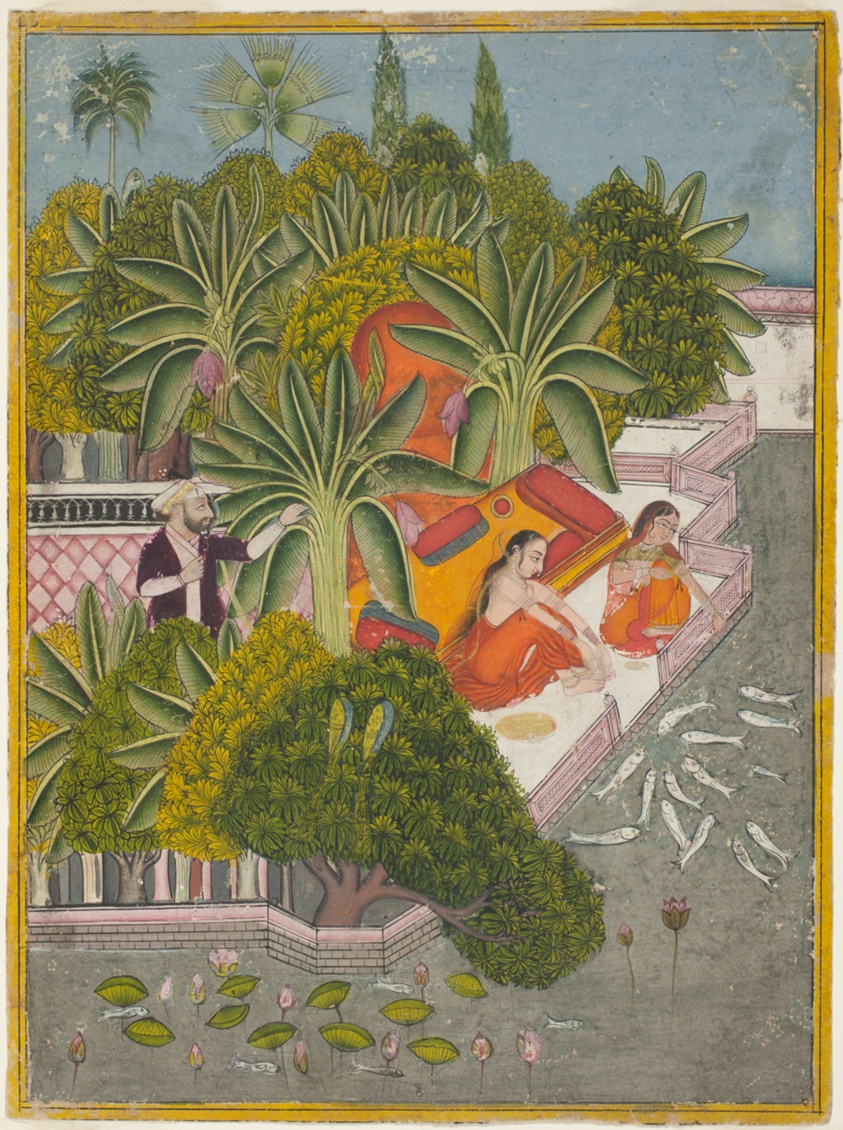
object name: Painting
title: Royal Women Feeding Fish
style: South Asian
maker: India; Rajasthan, Bundi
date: c. 1740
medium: Opaque watercolor on paper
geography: India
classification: gouache; painting; asian art